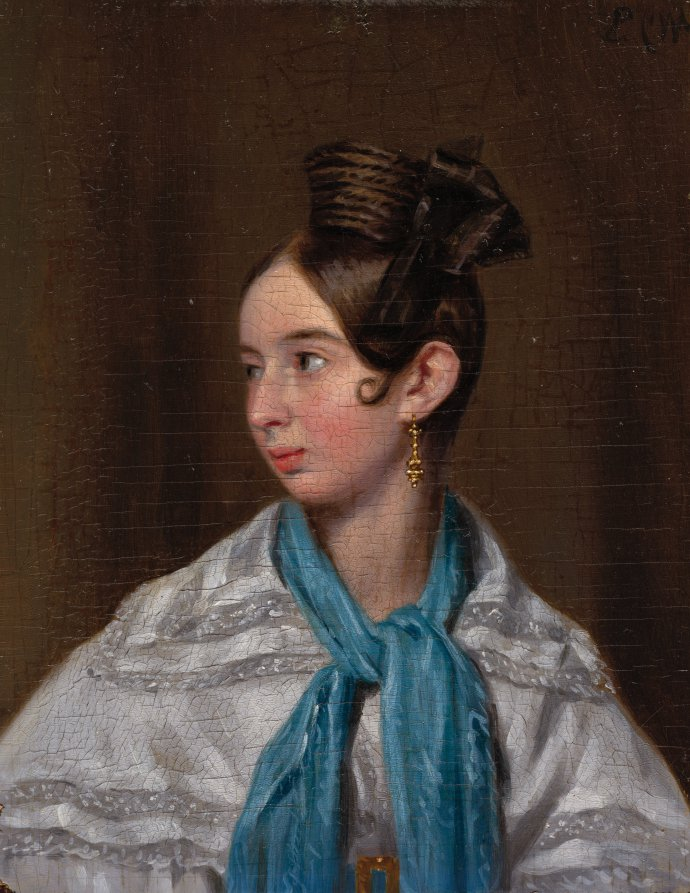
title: Elisa Pearson Playter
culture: Netherlands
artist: Pieter Christoffel Wonder (Dutch, 1780–1852)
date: c. 1837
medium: oil on wood panel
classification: Painting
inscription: Signed in black paint in upper right corner: P.C.W.